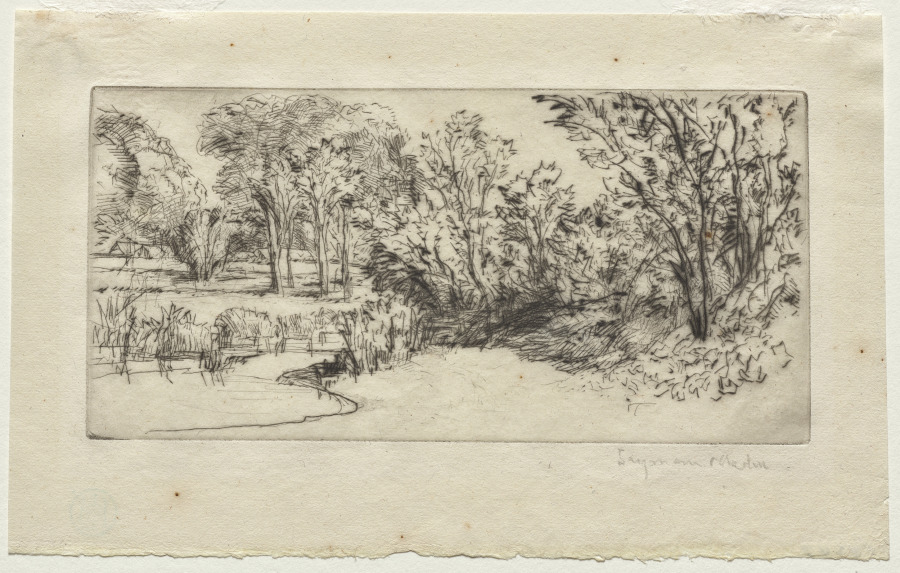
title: The Little Longparish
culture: England, 19th century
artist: Francis Seymour Haden (British, 1818–1910)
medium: drypoint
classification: Print